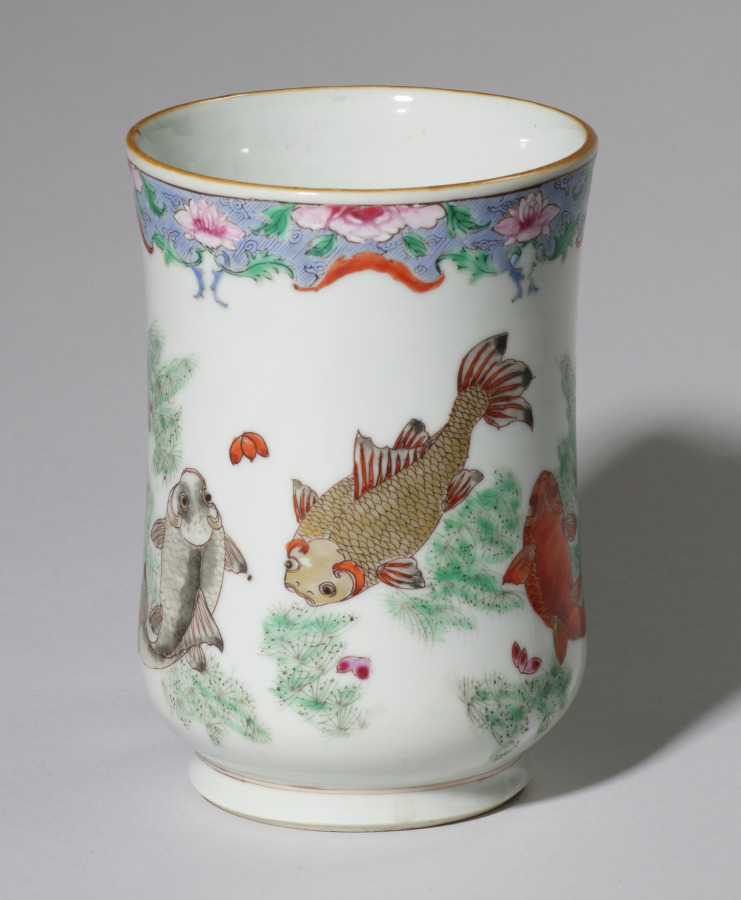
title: Mug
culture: China, Chinese Export -- European Market, 19th century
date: c. 1800–1825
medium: porcelain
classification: Ceramic